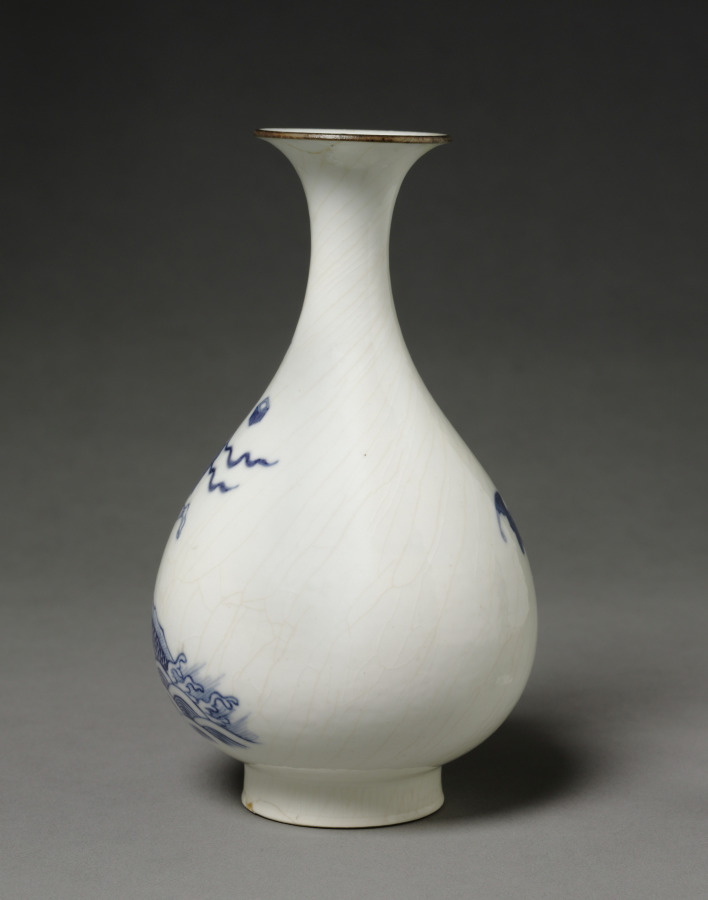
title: Pear-Shaped Vase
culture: China, Jiangxi province, Jingdezhen kilns, Qing dynasty (1644-1911), Yongzheng reign (1723-35)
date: 1723–35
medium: porcelain with underglaze blue decoration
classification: Ceramic